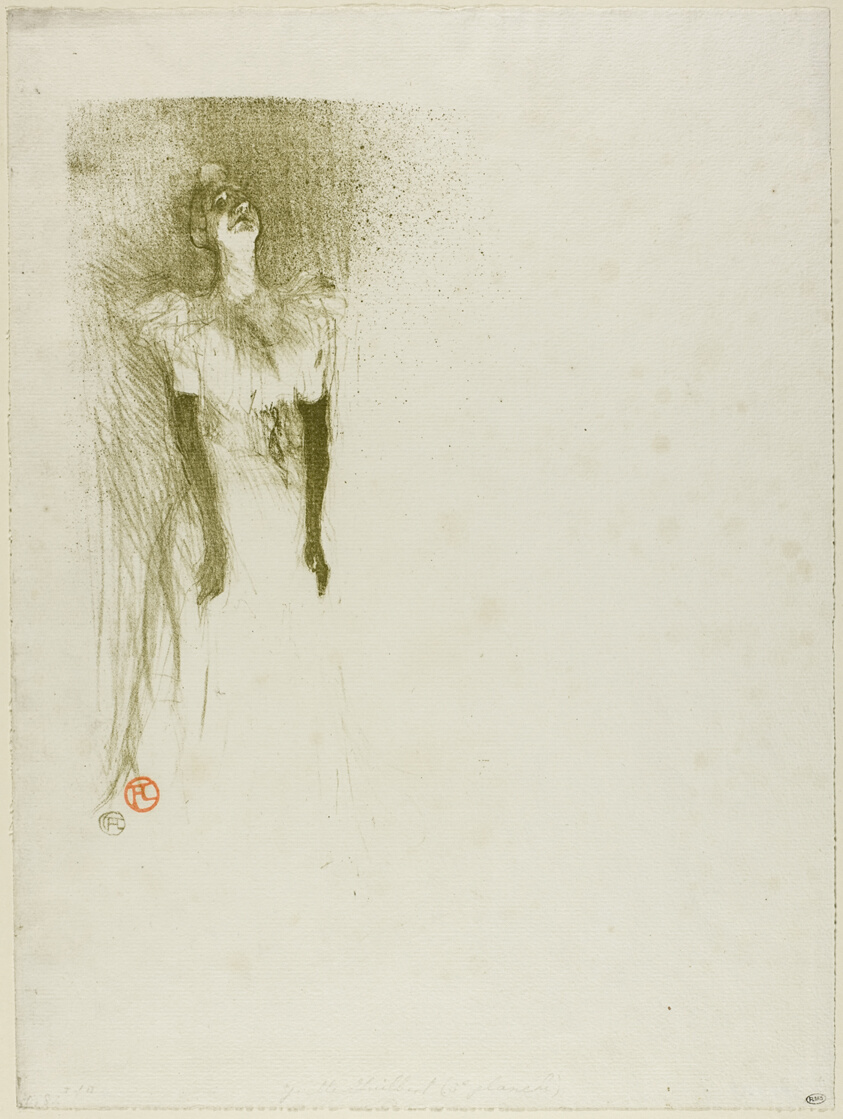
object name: Print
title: Yvette Guilbert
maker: Henri de Toulouse-Lautrec (French, 1864-1901)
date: 1894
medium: Color lithograph on ivory laid paper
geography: France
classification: lithograph; print; prints and drawing